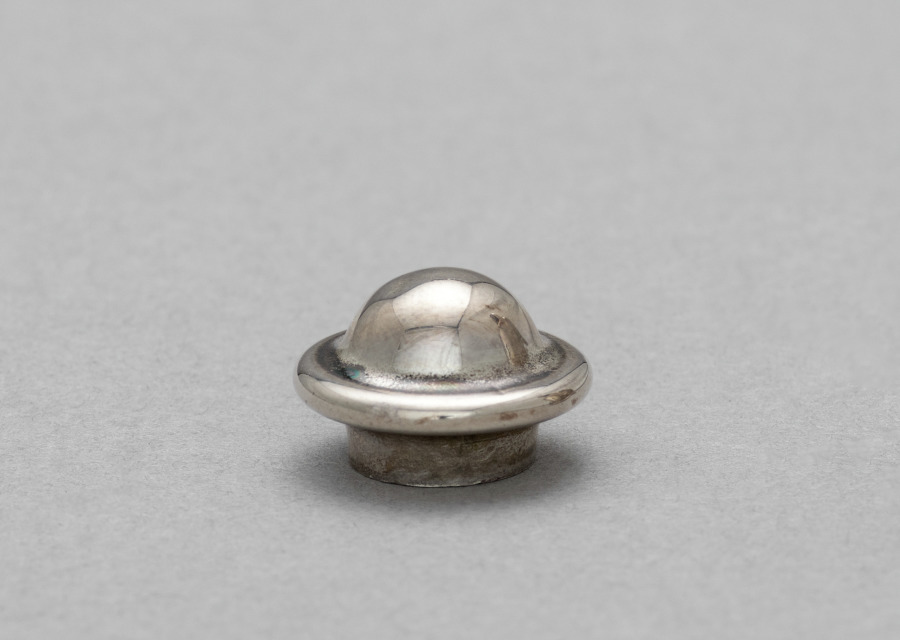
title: Stopper for Scent Bottle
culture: America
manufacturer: Tiffany & Co. (America, New York, est. 1837)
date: c. 1860–70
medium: silver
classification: Silver